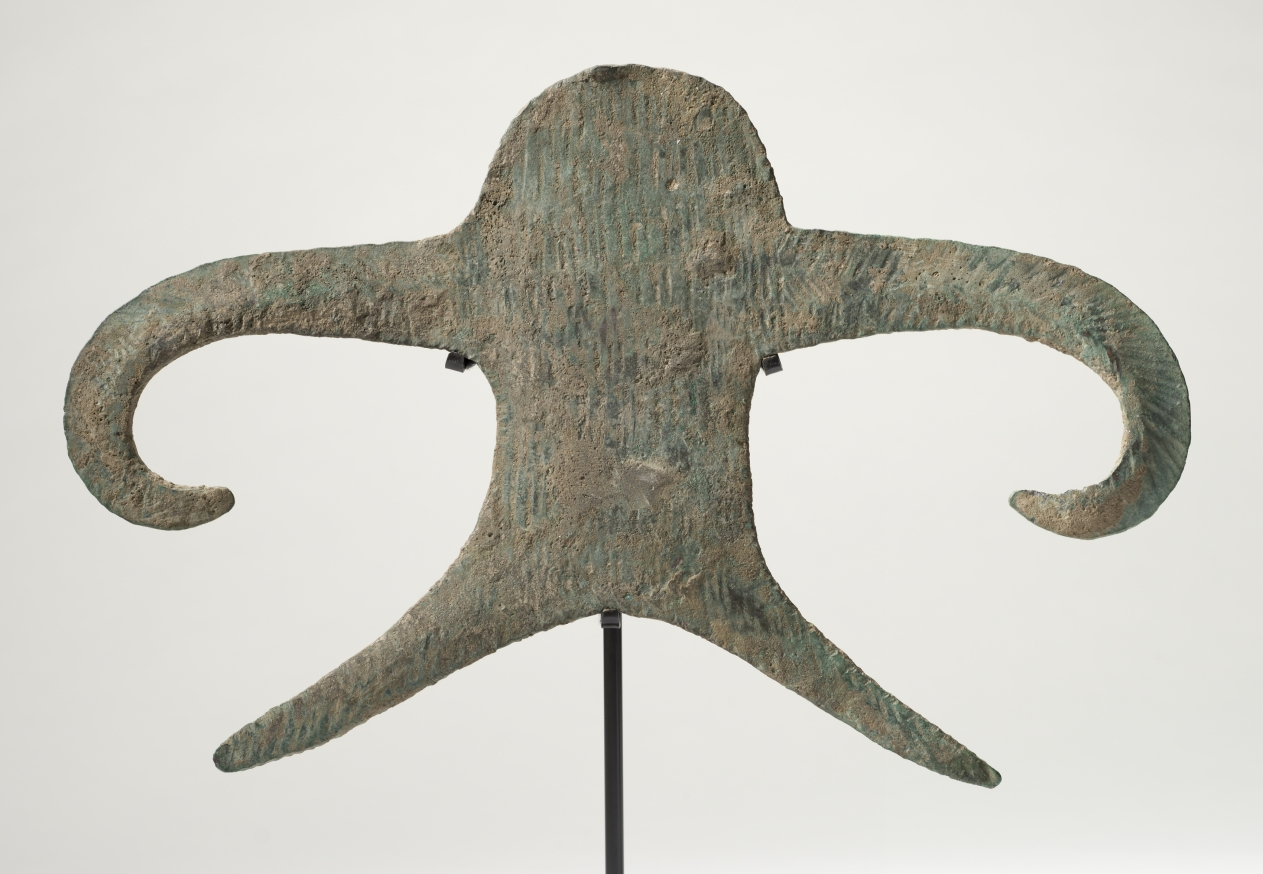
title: Anthropomorph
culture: India, Bronze Age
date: c. 1500–1000 BCE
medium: copper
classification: Sculpture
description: Among the few works of art known from the first millennium BC in India, anthropomorphs such as this fine example have an abstract formal appeal, but their meaning and function remain mysterious. They were made during the approximately 1,500-year long period of time between the protohistoric Indus Valley civilization, which flourished between about 2,800–1,800 BC, and the Maurya period (322–187 BC), when works of art must have been made in perishable materials that no longer survive.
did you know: Most of these mysterious objects were discovered in the plain regions of the Ganges and Yamuna Rivers of northern India.